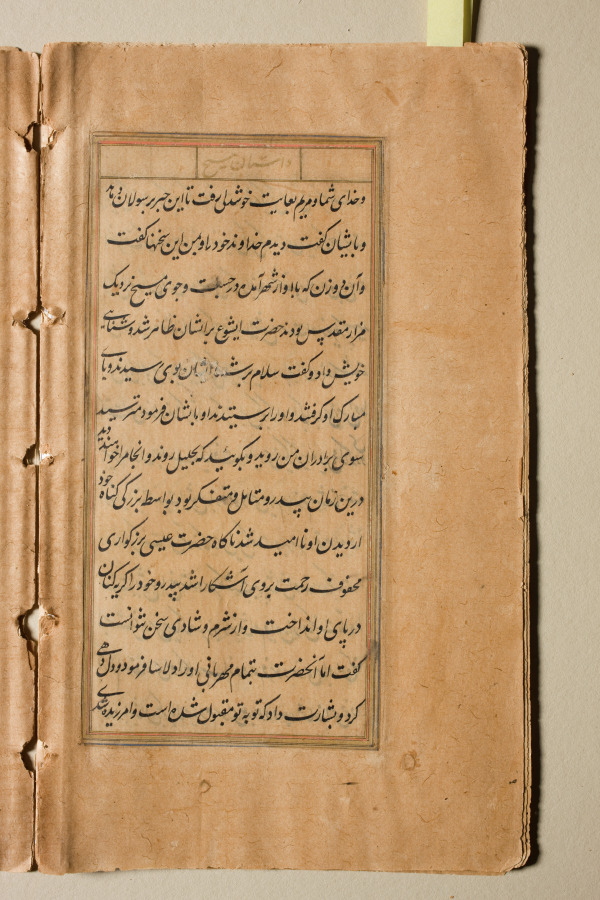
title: Text page from a Mirror of Holiness (Mir’at al-quds) of Father Jerome Xavier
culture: Mughal India, Allahabad, made for Prince Salim (1569–1627)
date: 1602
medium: Ink and gold on paper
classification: Manuscript